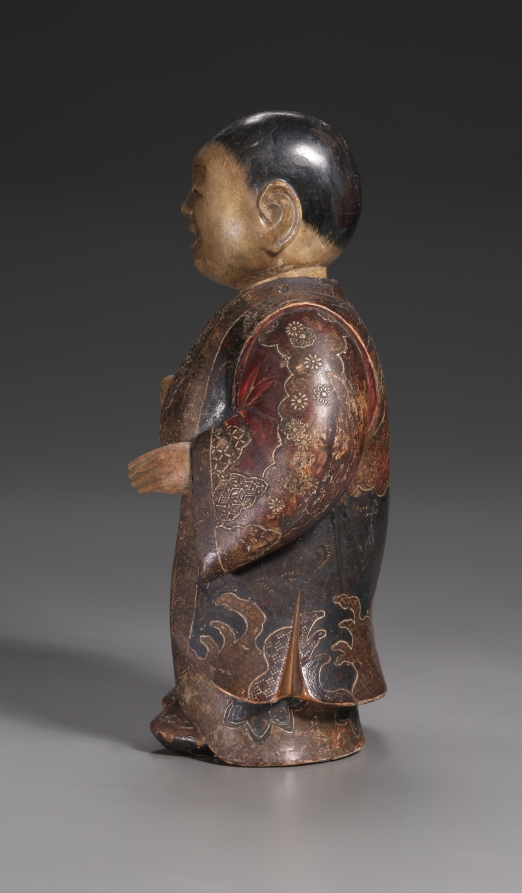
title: Boy with Puppy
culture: Japan, Edo period (1615–1868)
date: c. 1800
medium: wood with lacquer and color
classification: Sculpture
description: This is a Saga doll, a type of doll thought to have originated in 16th-century Saga, outside of Kyoto. The colors and patterns of the doll’s robe resemble the fashion of the latter part of the Momoyama period (1573–1615). The doll is a nodder, with its head carved separately; when its head moves, its tongue sticks out.